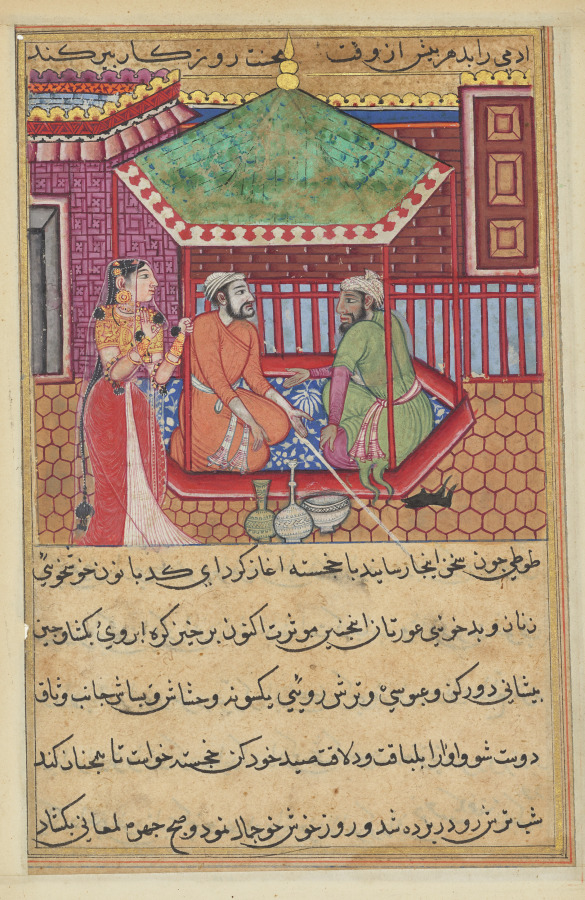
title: The eldest brother explains the reason for his youthful appearance, from a Tuti-nama (Tales of a Parrot): Forty-ninth Night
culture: Mughal India, court of Akbar (reigned 1556–1605)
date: c. 1560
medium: gum tempera, ink, and gold on paper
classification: Painting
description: A king’s official sits conversing with the oldest of three brothers. Despite his advanced age, the man appears younger than all of his siblings. When asked, he explains that he has not aged because his life is free of anxiety: his farm yields abundant crops, and his wife is obedient and happy.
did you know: Strings of pearls are braided into the woman’s hair.